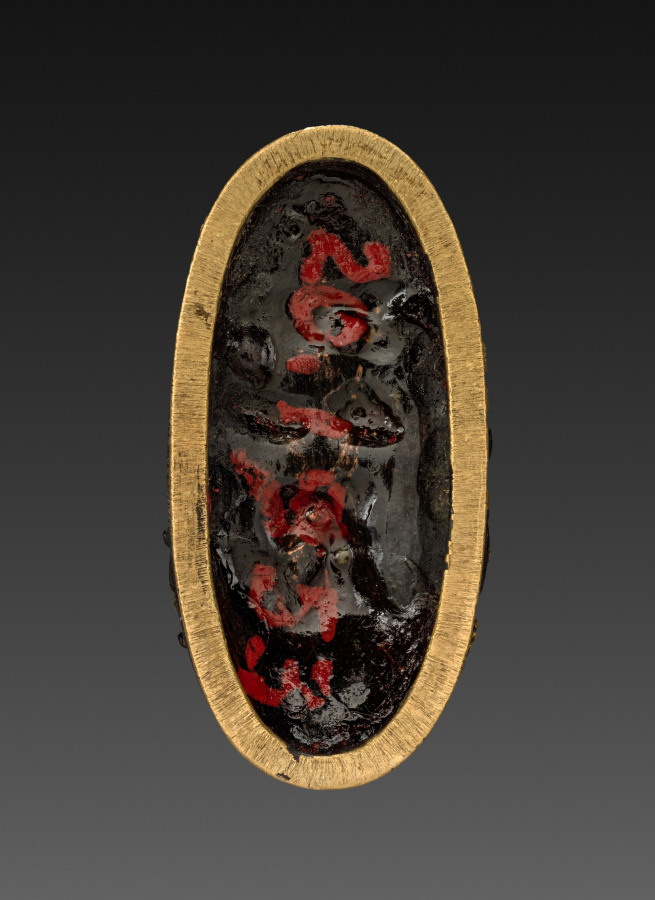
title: Sword-Hilt Pommel (Kashira)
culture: Japan, Edo period (1615–1868)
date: 1700–1850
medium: shakudo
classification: Arms and Armor